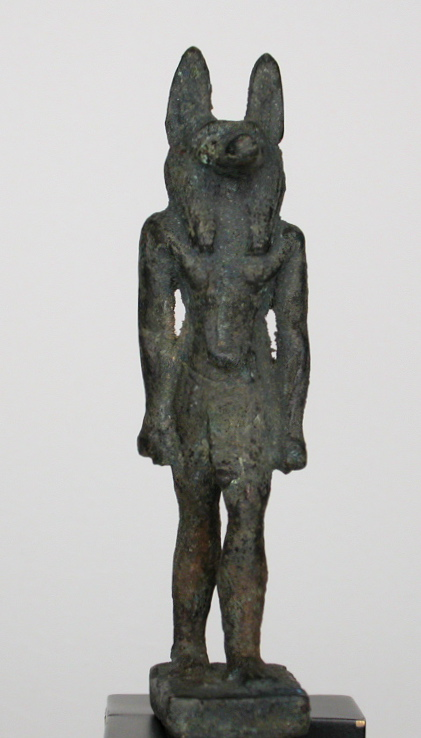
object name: Sculpture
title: Statuette of the God Anubis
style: third intermediate period, egyptian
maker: Egyptian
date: Third Intermediate Period–Late Period, Dynasty 21–31 (about 1069–332 BCE)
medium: Bronze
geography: Egypt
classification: statuette; bronze; metal; sculpture; ancient art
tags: gods (deities)